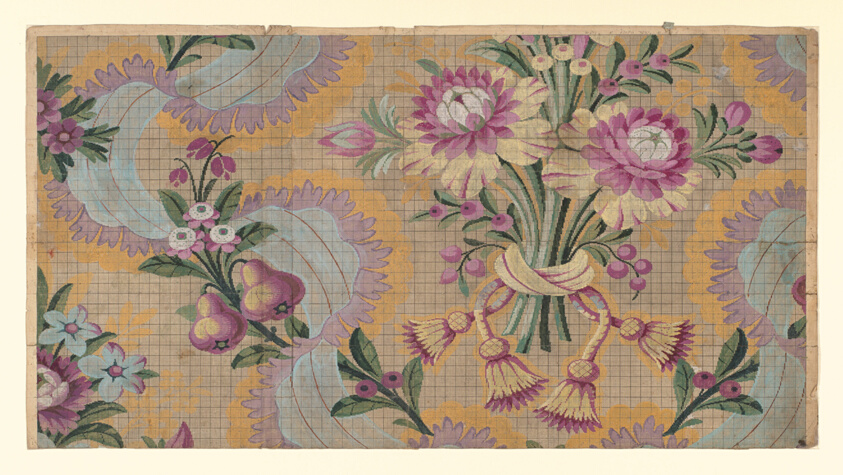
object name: Drawing and Watercolor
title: Mise-en-carte (Point-paper)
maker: Designed by J Bt Clere and Germain Frères; France, Lyon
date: 1787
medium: Ink and gouache on hand drawn graph paper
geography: France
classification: textile; accessory - paper design; accessories (object genre)